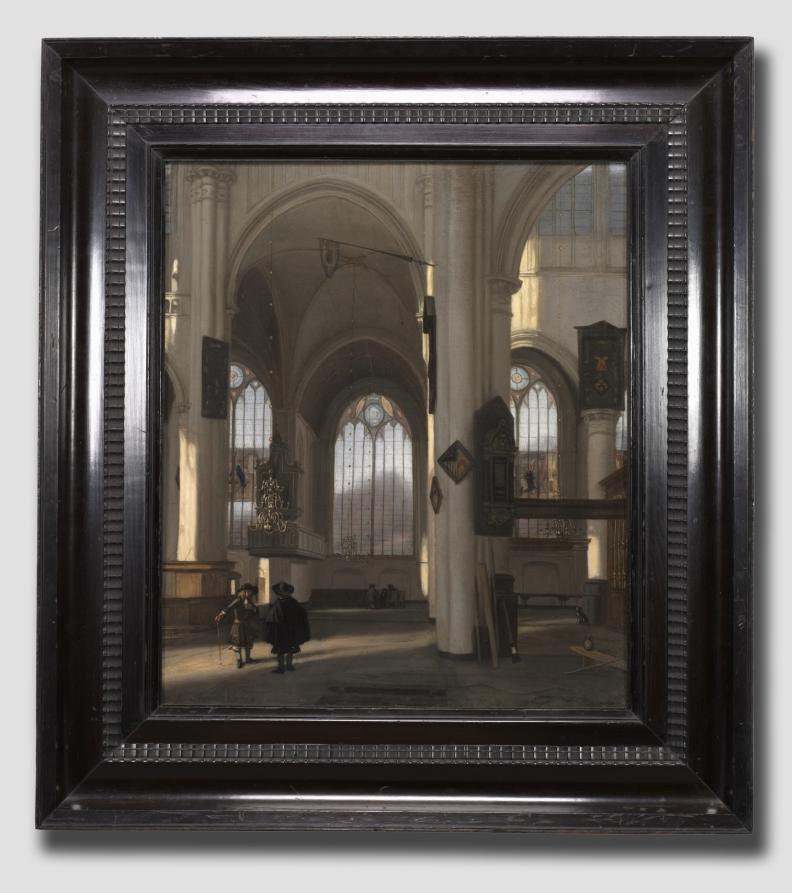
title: Interior of a Church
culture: Netherlands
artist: Emanuel de Witte (Dutch, c. 1617–1692)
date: c. 1680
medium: oil on canvas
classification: Painting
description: Although this spacious church interior is largely imaginary, Emanuel de Witte’s precise description of architectural forms convinces us that he depicted an actual place. To create a sense of familiarity, he included some specific architectural features from the Oude Kerk (Old Church) in Amsterdam. In the late 1500s, militant Protestant sects occupied Catholic churches in the Netherlands and stripped them of rich decorations and “idolatrous” images. The resulting spare, whitewashed interiors became a favorite subject of Dutch artists, who were intrigued by the interplay of light and shadow over the unadorned walls, and by the challenge of depicting perspectival space.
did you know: In the 1600s, Dutch churches functioned as public gathering places—even dogs were allowed!